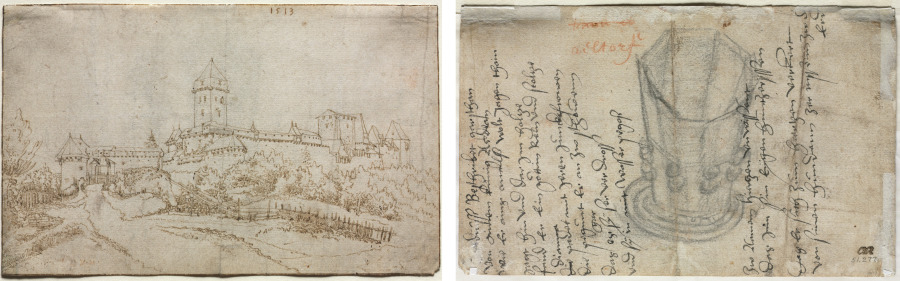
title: View of a Castle (recto); Eight-Sided Cup (verso)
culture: Austria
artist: Wolfgang Huber (Austrian, 1490–1553)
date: 1513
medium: pen and brown ink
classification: Drawing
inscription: recto: upper center, in brown ink: 1513; lower left, in brown ink: v. h verso: by artist?, across entire sheet, in black ink: [Ov]iduss Beschribet gar schon / Von einem Cunig Akteon / Wie er aing malß wolt jagen thain / jagt hin und da jm Holtze / fand er ein Göttin Rein vnd stoltze / Diana / die padet mit jeren junkfrauen / die pegünnt er an zu schowen / Daß es sie ser verdross / sy in mit Wasser pegoss / Zw [illegible] Hirschen un wissent / daß jm sin eigen Hünt zeryssen / Daß er sich zum Hirschen verkert / von seinen Hunden zerrissen zu d[illegible] / Erd [sideways]; upper center, in red chalk: [illegible, crossed out] / adltof.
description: This drawing depicts a castle in southern Germany in the area around the Danube River known for its wooded and rocky heights and dramatic views. Wolfgang Huber's meandering, pen and ink lines describe the contours of the earth and the lushness of summer foliage in a horizontal layout that focuses on the middle distance with a barely recorded foreground. Huber may have made the drawing during a journey between Feldkirch and Vienna as he traveled along the Danube. In 1513 when this drawing was made, landscape was rarely depicted as a subject in and of itself, but artists in the Danube region such as Huber exhibited a profound sensitivity to nature. A drawing on the reverse of the sheet depicts a cup studded with gems and a poem written in a contemporary hand telling the mythological story of Actaeon's transformation into a stag when he intruded upon the goddess Diana and her nymphs bathing.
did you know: This sheet of paper, with drawings on both sides, as well as a poem, shows how artists in the Renaissance often used one sheet of paper for various purposes.